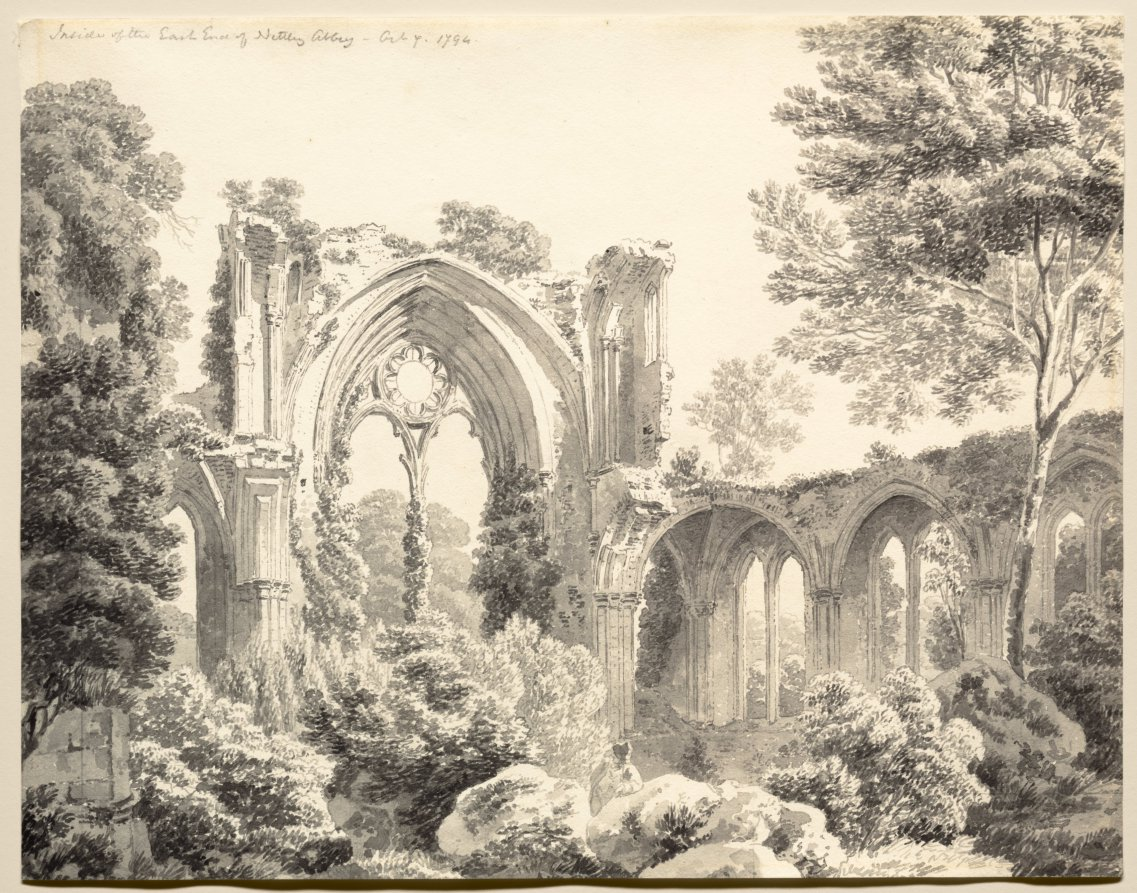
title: Inside the East End of Nettley Abbey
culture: England, 18th century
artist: Michel Angelo Rooker (British, 1746–1801)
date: 1794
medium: gray wash with extensive point of brush with traces of graphite; squared with graphite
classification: Drawing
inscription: inscribed, in graphite, upper left edge: Inside of the East End of Nettley [sic] Abbey - Oct 7, 1794; inscribed, in graphite, on verso, at center: Inside of the East end of Netley. Abbey Oct 7th 1794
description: By the end of the 18th century, Britain’s medieval ruins had become popular tourist destinations and a rich source of inspiration for Romantic poets and painters, establishing a veritable "cult of ruins." Decaying Gothic architecture set in overgrown landscapes conjured thoughts of the transience of human ambition in the context of eternal nature. In 1755, the writer and Whig politician Horace Walpole described Netley Abbey: "The ruins are vast . . . with all variety of Gothic patterns of windows wrapped round and round with ivy—many trees are sprouted up against the walls and want only to be increased with cypresses! In short, they are not the ruins of Netley, but of Paradise." Michael Angelo Rooker’s drawing gives form to Walpole’s description of his magical visit to the ruined abbey.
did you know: Netley Abbey, seen in this drawing, was a popular subject in art and literature at the time Michael Angelo Rooker depicted it.